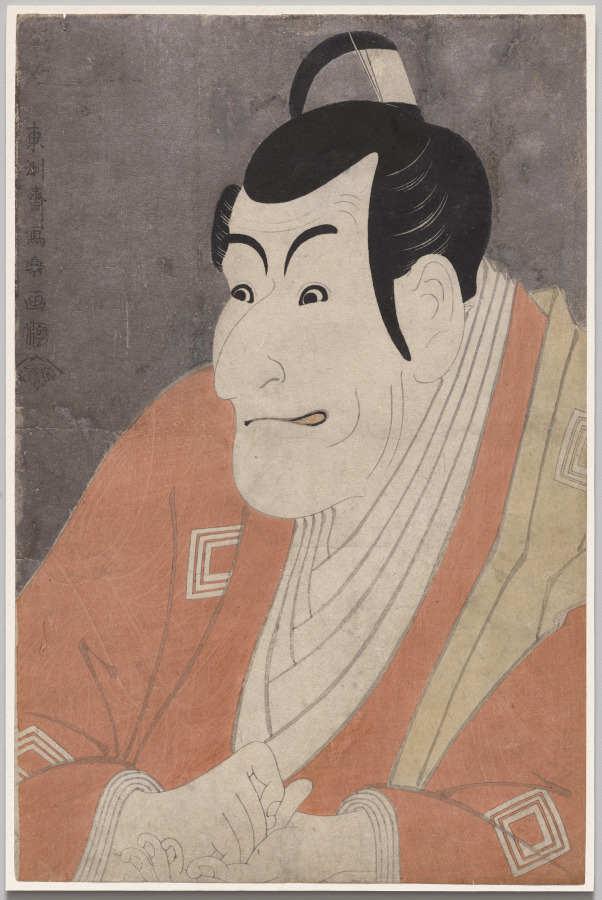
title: Ichikawa Ebizō IV (Danjurō) as Takemura Sadanoshin in The Loving Wife's Parti-Colored Reins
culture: Japan, Edo period (1615–1868)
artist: Tōshūsai Sharaku (Japanese, active 1794–95)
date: 1794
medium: color woodblock print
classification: Print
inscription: Signature: Toshusai Sharaku ga. Publisher: Tsutaya Juzaburo (emblem). Censorship Seal: kiwame.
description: Ichikawa Ebizō IV’s (1741–1806) character, an actor called Takemura Sadanoshin, is permitted to perform opposite his daughter so he can see and hear her for the last time before her banishment for a forbidden love affair. This design belongs to a category of Japanese prints called “actor images” (yakusha-e or 役者絵). They were collected by fans of popular Kabuki actors. Kabuki is a kind of entertainment that got its start in the early Edo period, evolving from dance performances with simple storylines to long plays with complex plots, elaborate sets, and full musical accompaniments. Performers wear showy costumes and heavy makeup and strike poses called mie at critical moments in the narrative. Dialogue is spoken in a stylized way that resembles singing.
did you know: A member of the famous Ichikawa acting family, Ebizo IV is recognized here by his family crest of three nested boxes, visible on his robes.